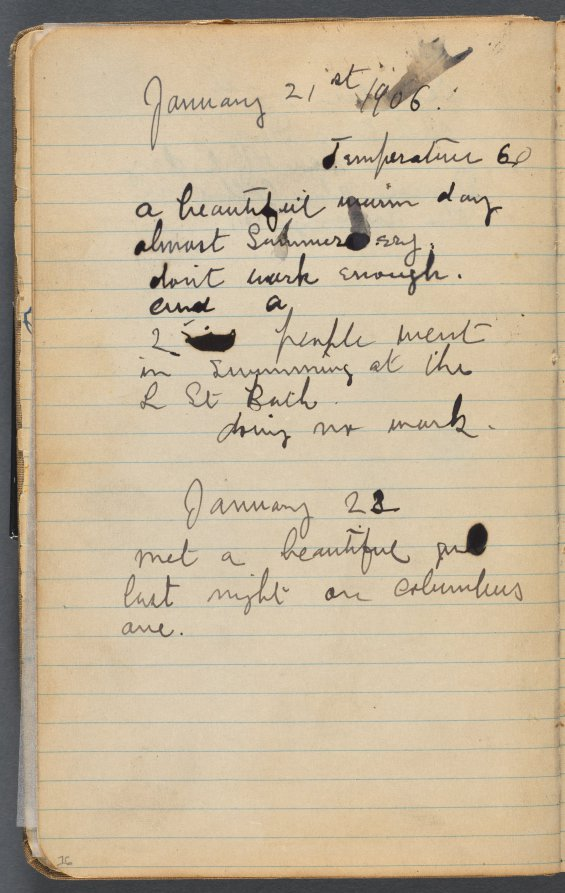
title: Sketchbook, page 016: Notes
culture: America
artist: Maurice Prendergast (American, born Newfoundland [now Canada], 1858–1924)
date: 1905–10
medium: graphite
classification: Bound Volume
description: This sketchbook contains 69 pages of drawings, a diary largely devoted to the state of the artist's health, and a three-page discourse on the nature of genius and ideas.